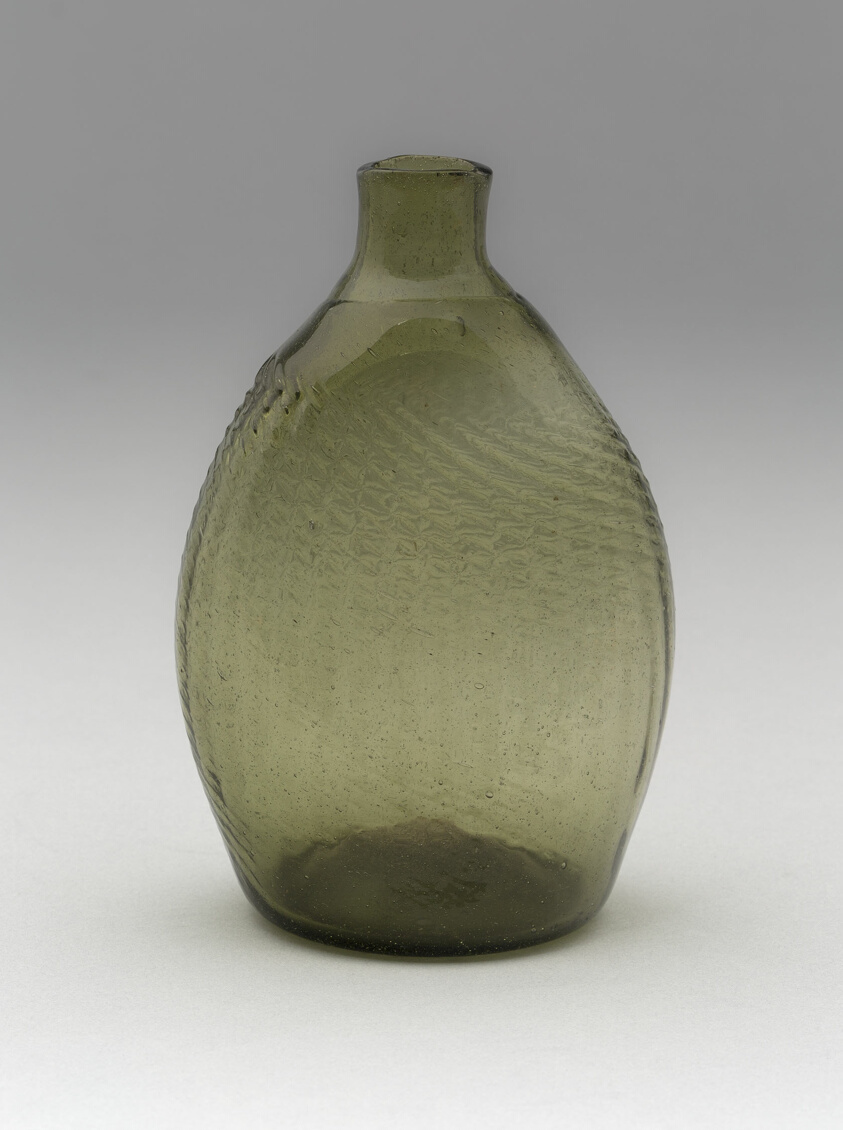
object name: Glass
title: Flask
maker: Artist unknown (American, 18th–19th century); New England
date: 1790–1830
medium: Pattern-molded glass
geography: Midwest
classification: flask (bottle); glass; american decorative arts; american arts; decorative arts